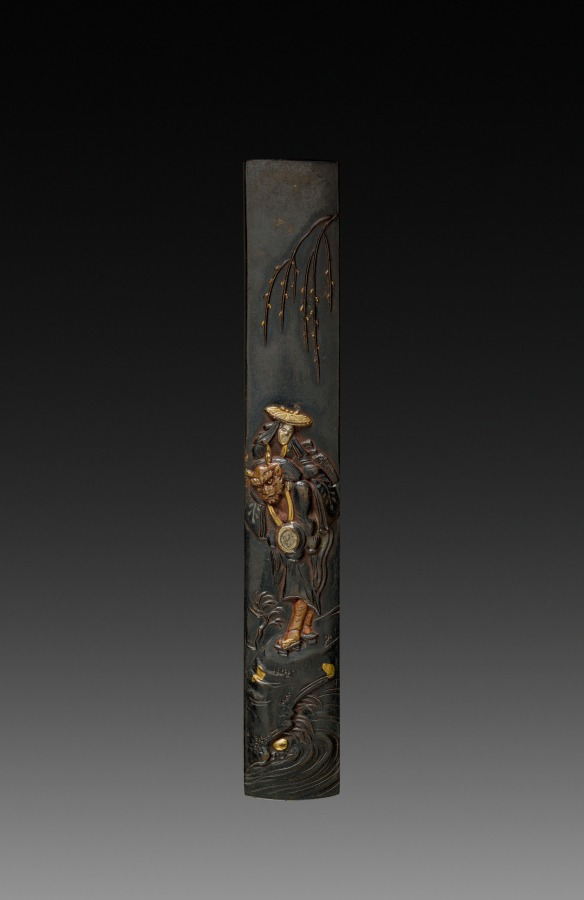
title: Knife Handle (Kozuka)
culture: Japan, Edo period (1615–1868)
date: early to mid-1800s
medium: inlaid bronze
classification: Metalwork